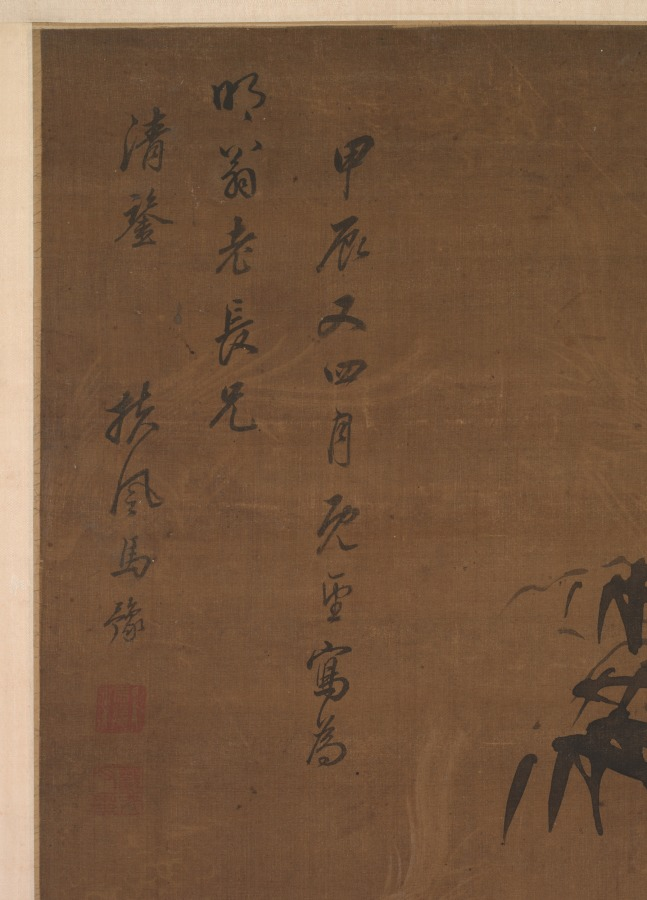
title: Bamboo in the Wind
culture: China, Qing dynasty (1644–1911)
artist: Ma Yu (Chinese, active 1706–1724)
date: 1724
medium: hanging scroll; ink on silk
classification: Painting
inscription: Artist's inscription and signature in upper left corner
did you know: In traditional Chinese culture, bamboo symbolizes a gentleman's virtuous resilience and flexibility.